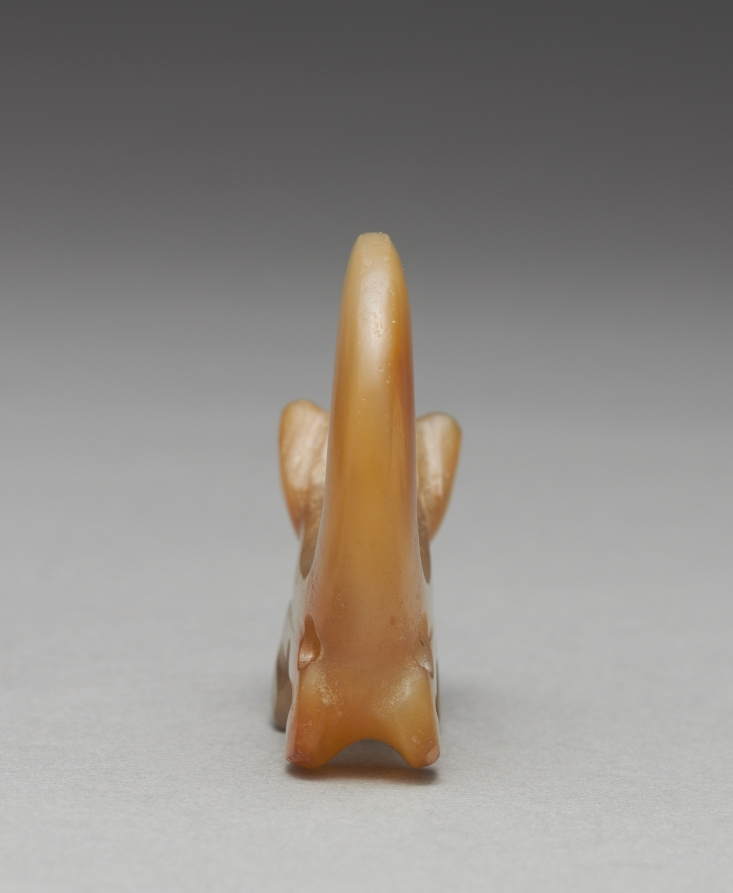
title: Curly-Tailed Animal Pendant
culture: Panama, Initial style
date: 100–800 CE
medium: agate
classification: Sculpture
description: A favored Initial-style subject is a charming animal whose curly tail-its most impressive feature-may derive from a monkey's. Its other traits vary considerably, causing it to be identified as everything from a dog to a duck. Initial-style gold ornaments represent Panama's oldest metalwork. Since metal technologies appeared suddenly and fully developed in Panama, it is likely that they were introduced from the outside, probably from Colombia to the south.